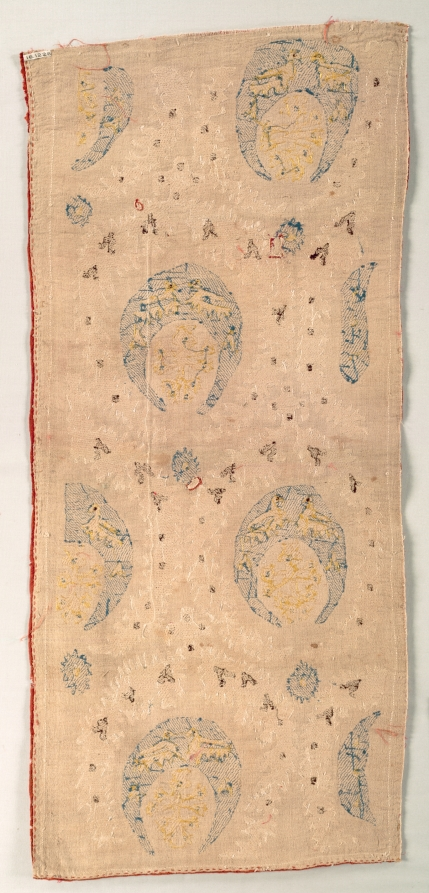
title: Embroidered Cushion Cover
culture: Turkey, 18th century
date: 18th century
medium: embroidery, silk thread on silk ground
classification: Embroidery